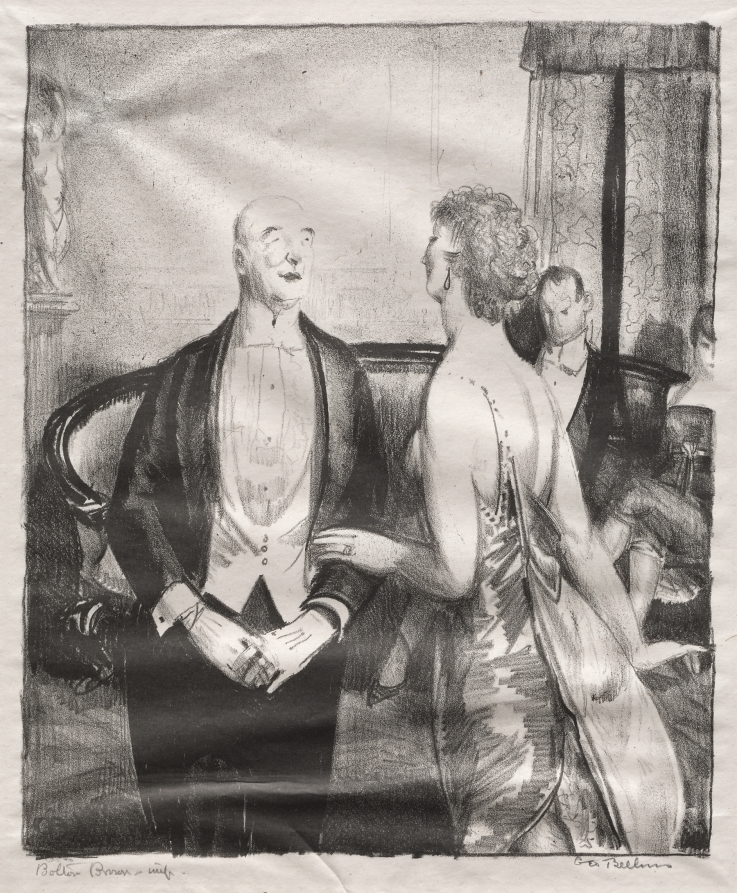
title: The Parlor Critic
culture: America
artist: George Bellows (American, 1882–1925)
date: 1921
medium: lithograph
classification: Print